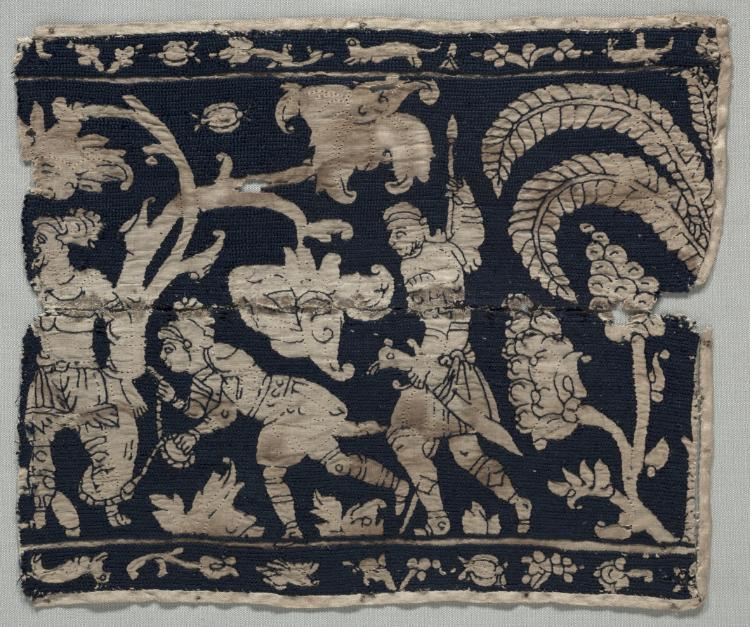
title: Embroidered Border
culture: Italy, 16th-17th century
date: 1500s-1600s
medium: embroidery; silk on linen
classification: Embroidery